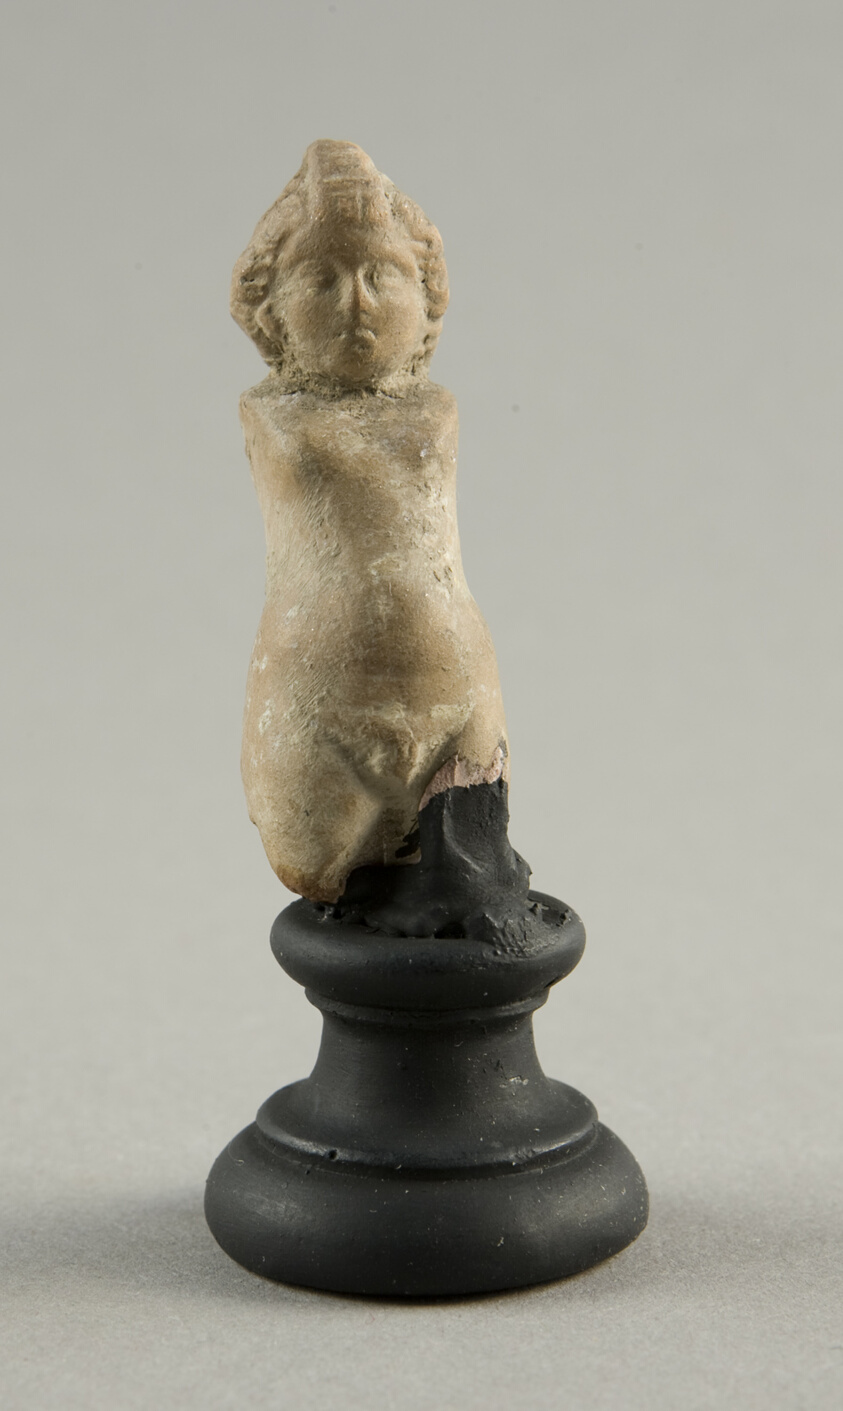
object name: Sculpture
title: Figurine of a Nude Boy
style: greek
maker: Greek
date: 2nd-1st century BCE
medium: terracotta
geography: Greece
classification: earthenware; ceramics; sculpture; ancient art